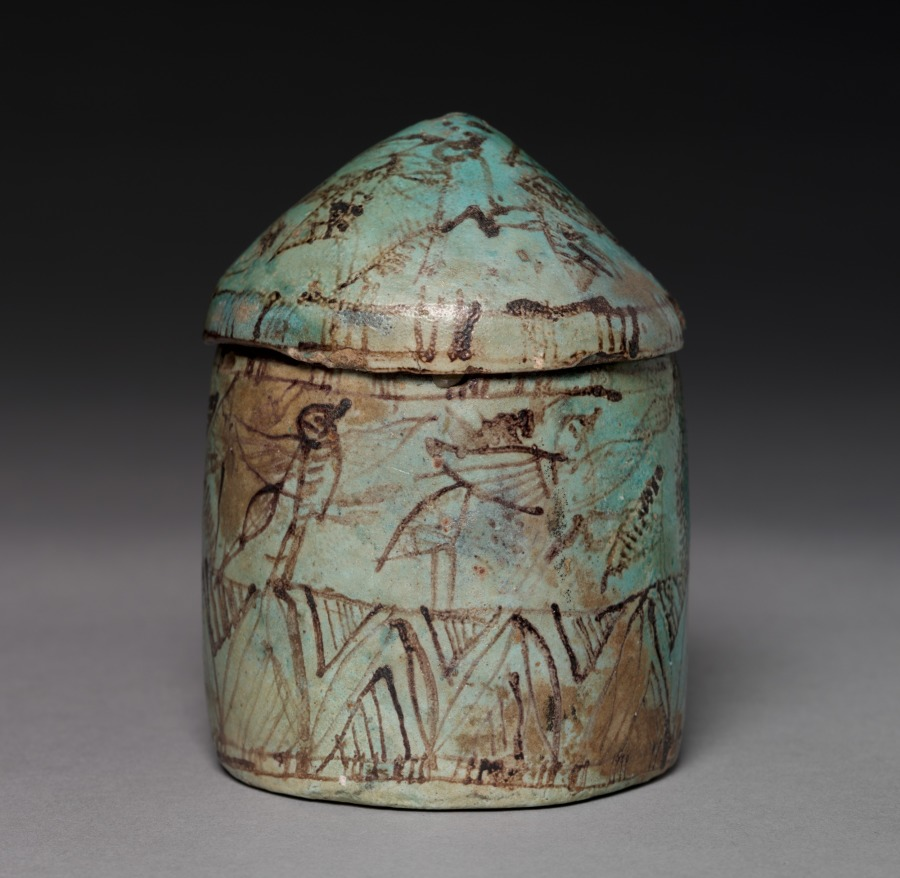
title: Pyxis with Lid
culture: Egypt, Middle Kingdom (2040–1648 BCE)–New Kingdom (1540–1069 BCE)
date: c. 1901–1525 BCE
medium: turquoise faience with black decoration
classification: Vessels